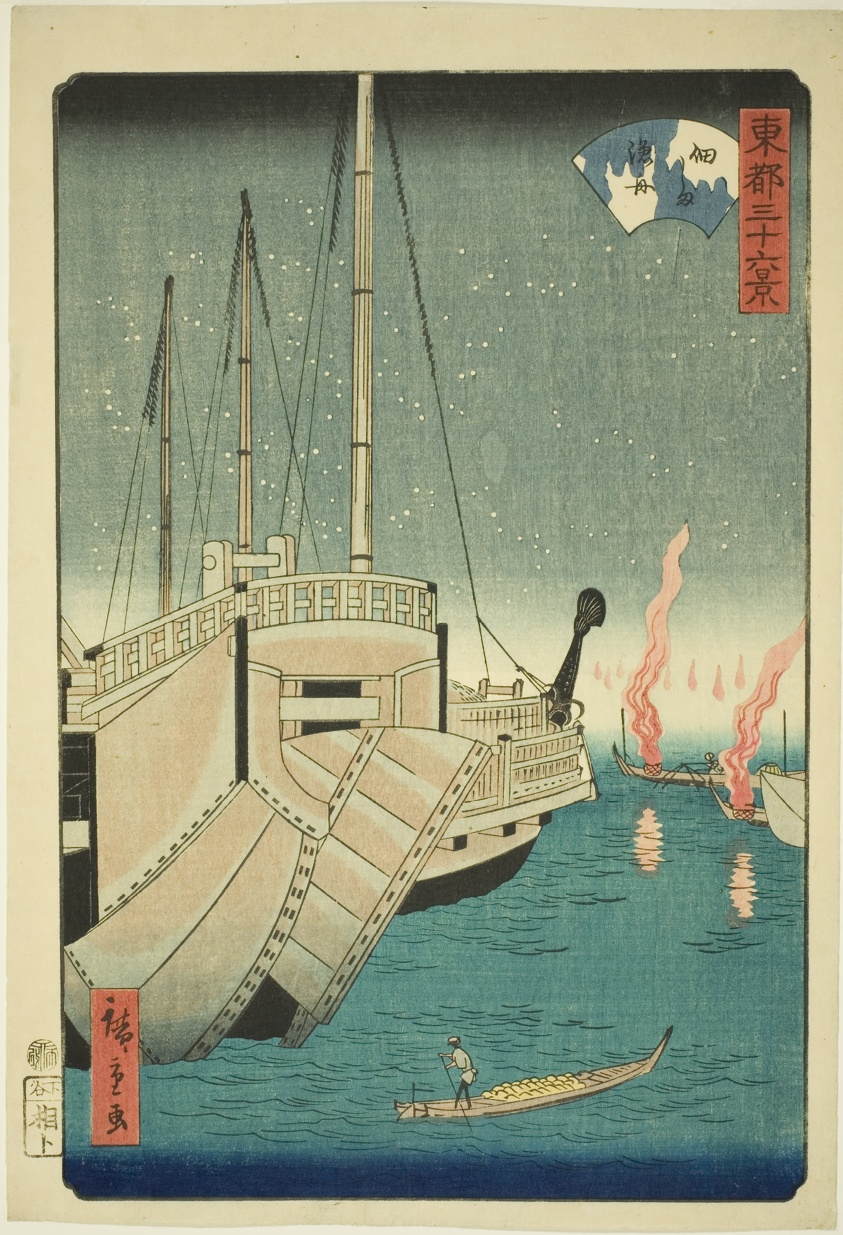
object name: Print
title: Fishing Boats at Tsukuda Island (Tsukudajima gyoshu), from the series "Thirty-six Views of the Eastern Capital (Toto sanjurokkei)"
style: Japanese (culture or style)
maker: Utagawa Hiroshige II (Shigenobu) (Japanese, 1826-1869)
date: 1862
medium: Color woodblock print; oban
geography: Japan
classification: woodblock print; print; asian art